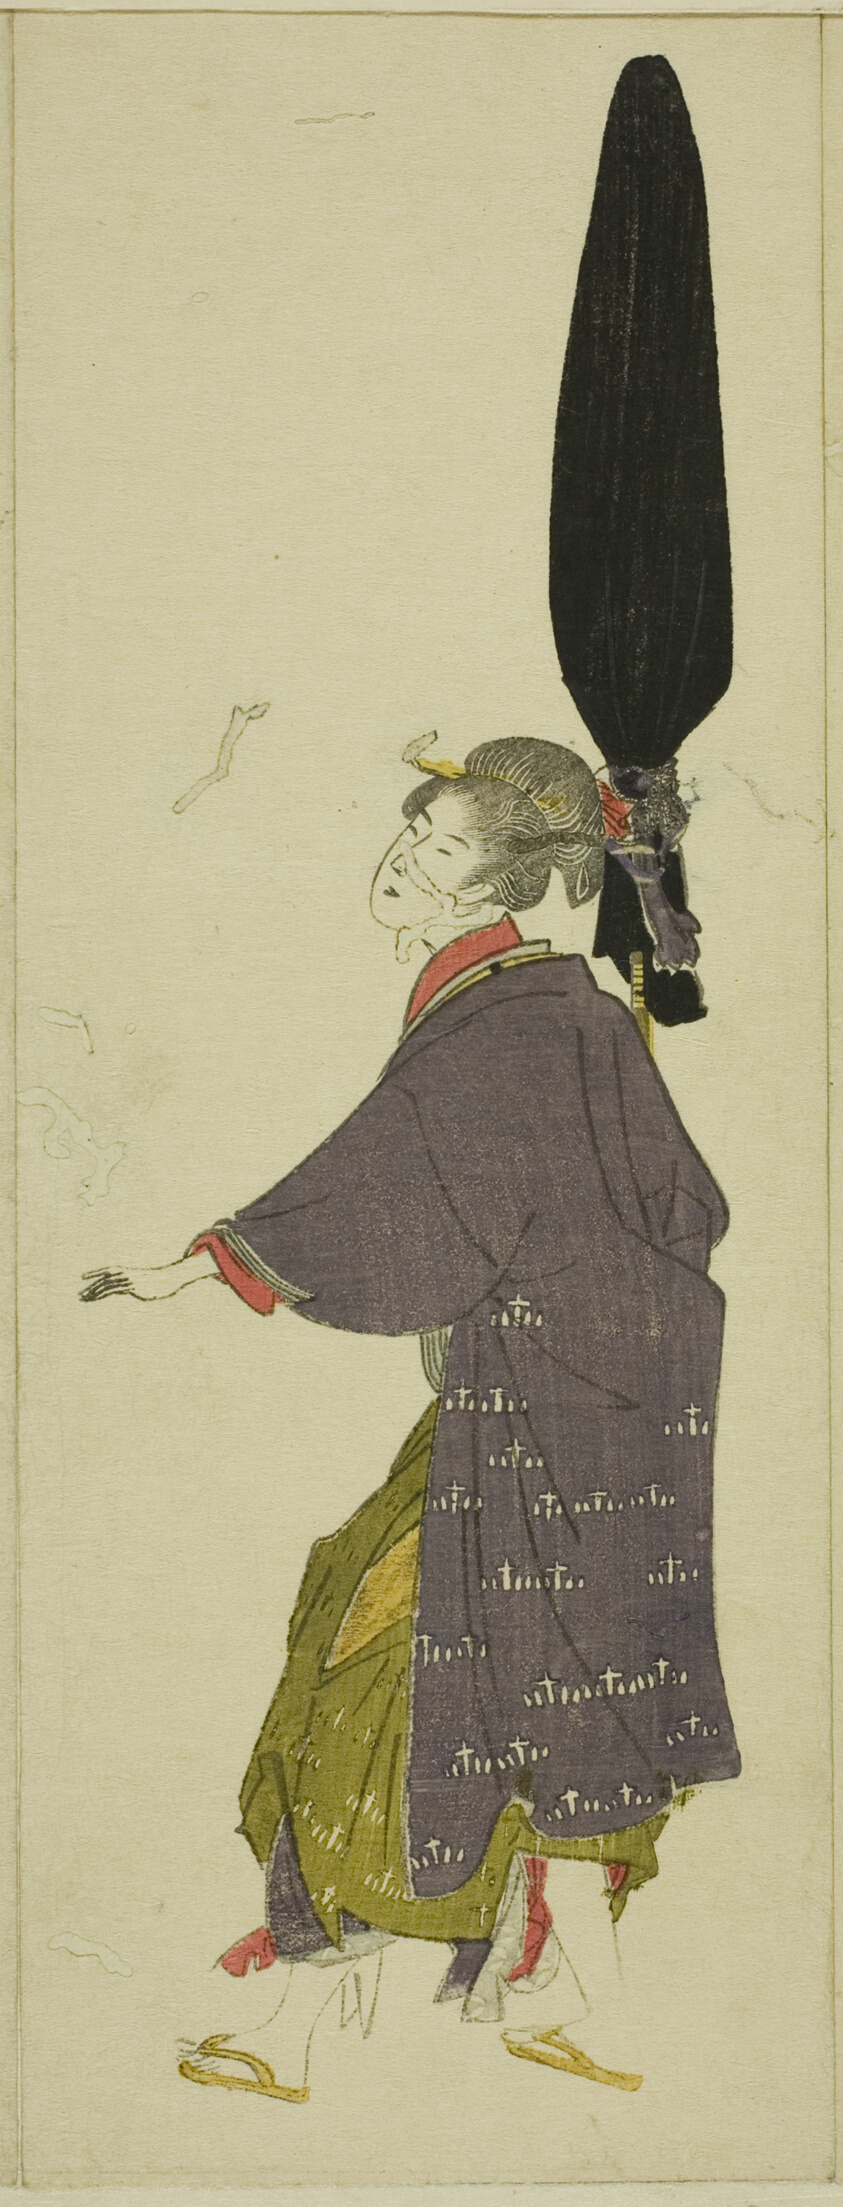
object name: Print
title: Parody of a daimyo procession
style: Japanese (culture or style)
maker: Utagawa Toyohiro (Japanese, 1773-1828)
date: c. 1805/07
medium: Color woodblock print; 1 of 12 sheets (see 1928.391-402)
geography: Japan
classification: woodblock print; print